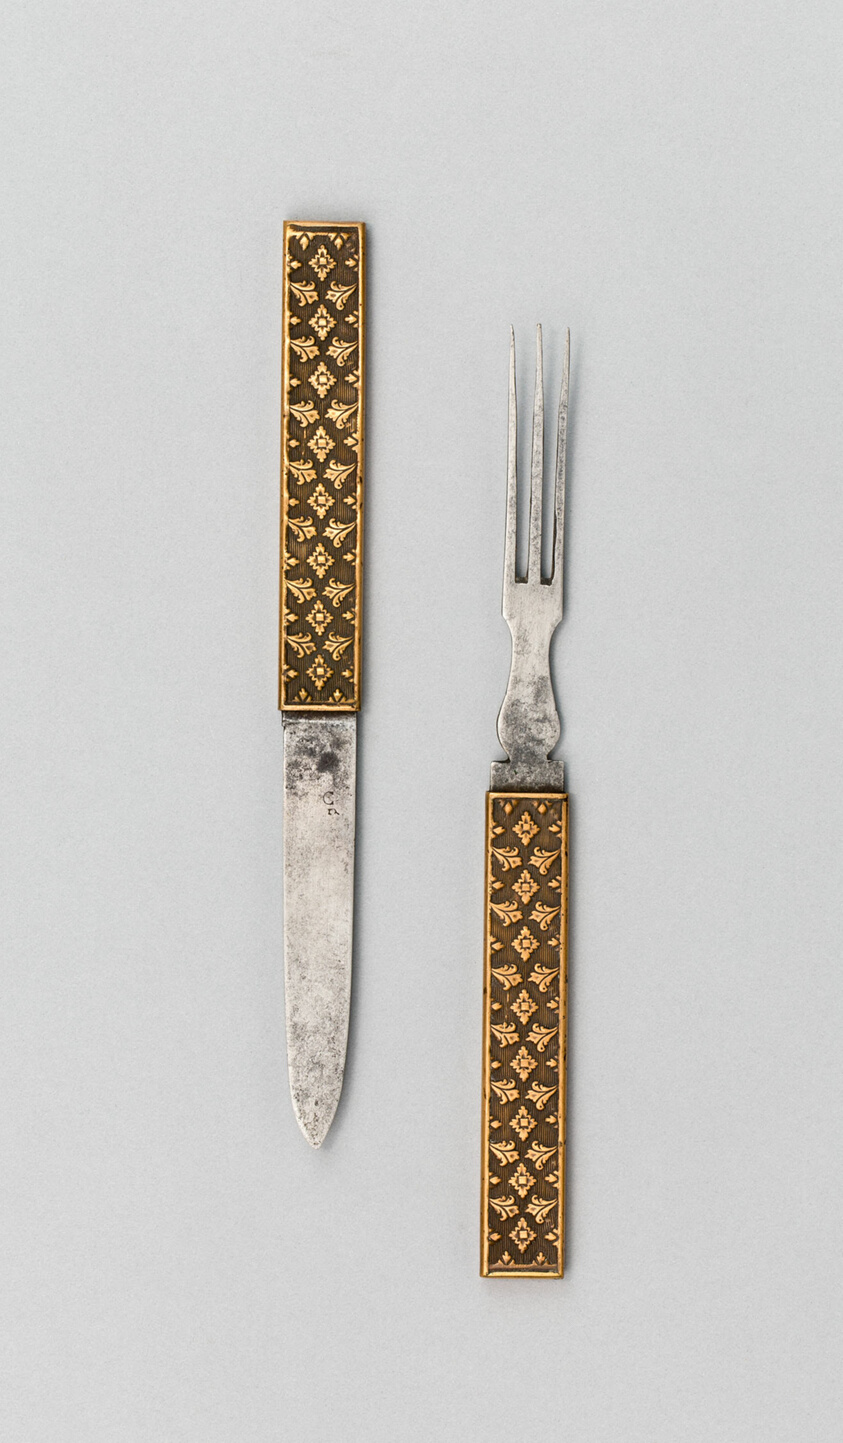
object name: Arms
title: Knife and Fork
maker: European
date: 19th century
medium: Steel and brass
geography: Europe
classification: cutlery; arms and armor, miscellaneous; arms and armor; arms